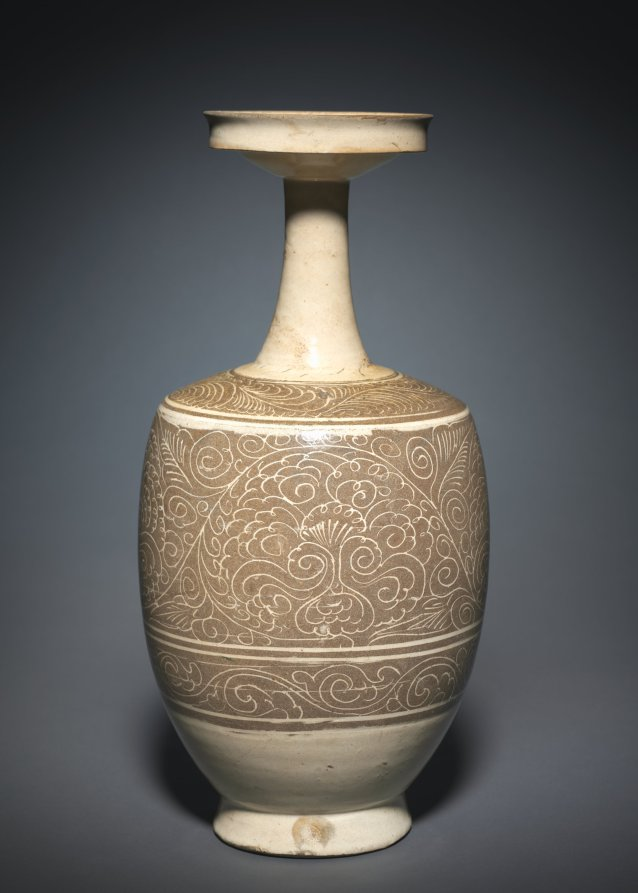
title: Vase with Floral Scrolls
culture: China, Henan province, Northern Song dynasty (960-1127)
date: 900s–1000s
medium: glazed stoneware with incised and slip-inlaid decoration, Cizhou ware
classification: Ceramic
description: Cizhou ware characteristically shows the use of slip coating, bold designs, and color contrasts to achieve stunning visual effects. This extremely rare and handsome vase is distinguished by its remarkable rhythmic execution of the floral designs achieved by the use of incised and slip-inlaid decoration. With firing, the slip coating and inlaid decoration assumed a soft ivory color whereas the exposed clay body displayed a warm cinnamon brown.